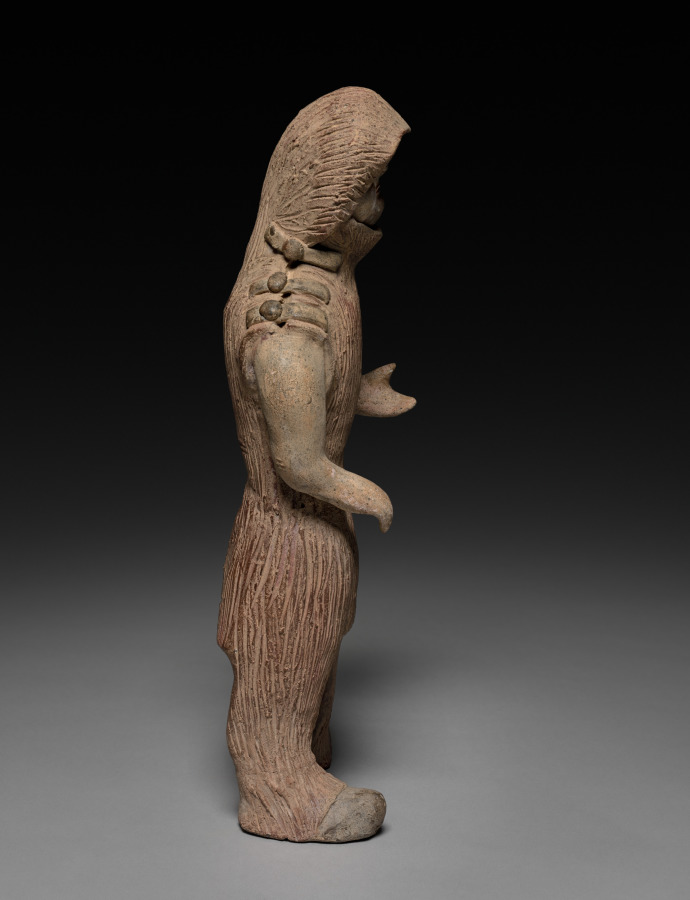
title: Figure of a Warrior in Leather Armor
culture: China, Modern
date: 20th Century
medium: buff earthenware with traces of polychromy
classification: Sculpture